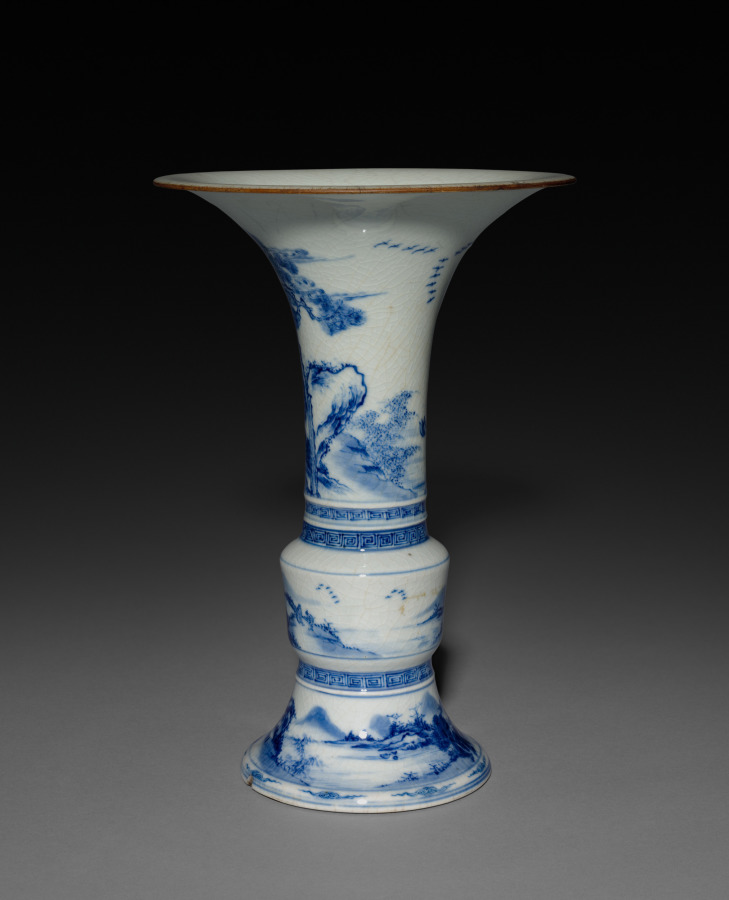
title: Beaker Vase in Form of Archaic Gu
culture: China, Jiangxi province, Jingdezhen kilns, Qing dynasty (1644-1911), Yongzheng reign (1723-35)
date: 1723–35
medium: porcelain with underglaze blue decoration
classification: Ceramic